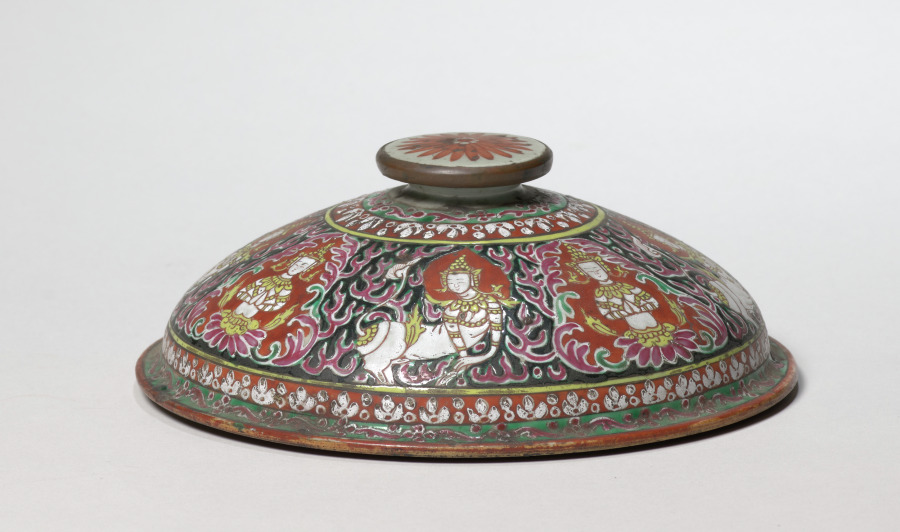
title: Jar (lid)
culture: Siam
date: 1800s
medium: porcelain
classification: Ceramic